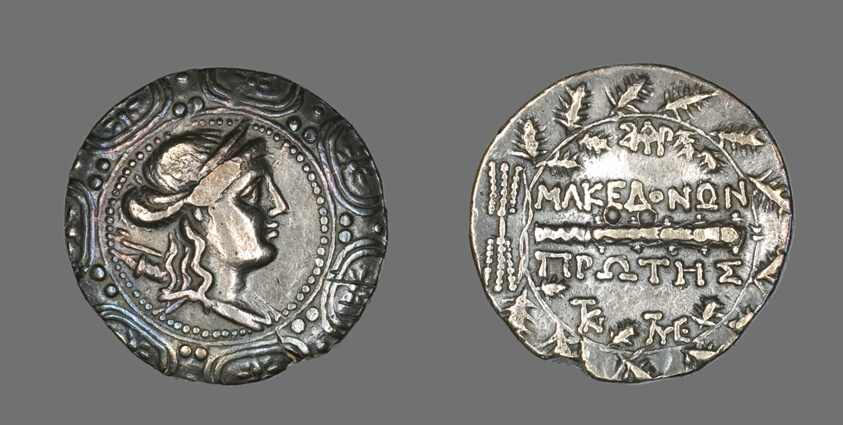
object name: Coin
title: Tetradrachm (Coin) Depicting a Macedonian Shield with the Goddess Artemis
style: roman (ancient, style or period), ancient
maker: Roman, minted in Amphipolis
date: 158-149 BCE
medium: Silver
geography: Roman Empire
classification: coin; ancient art